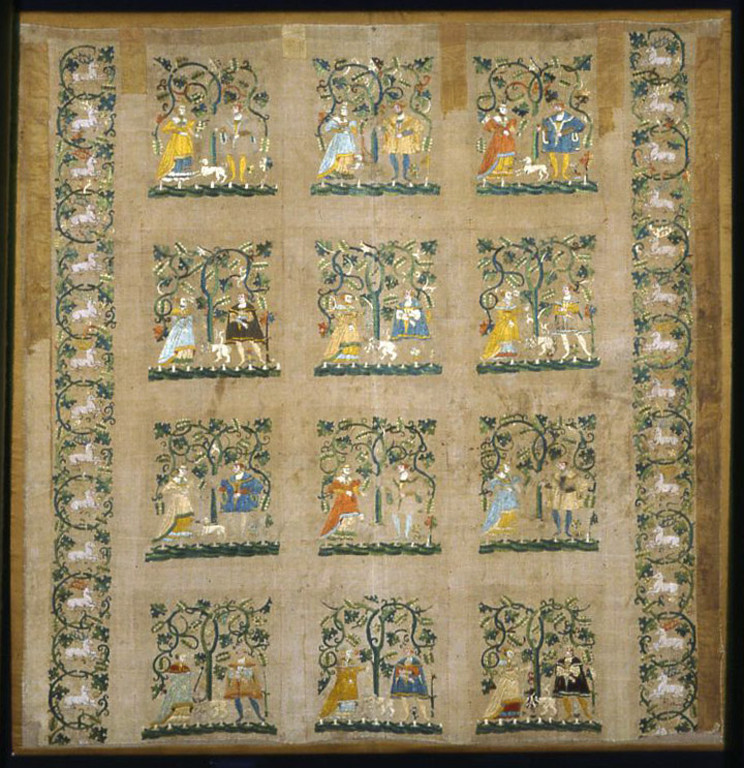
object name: Textile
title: Hanging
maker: Lower Saxony, Germany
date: 1530/40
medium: Linen, plain weave; embroidered with silk and linen in satin, split and stem stitches; appliquéd edging of silk, plain weave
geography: Germany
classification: textile; needlework (visual works)